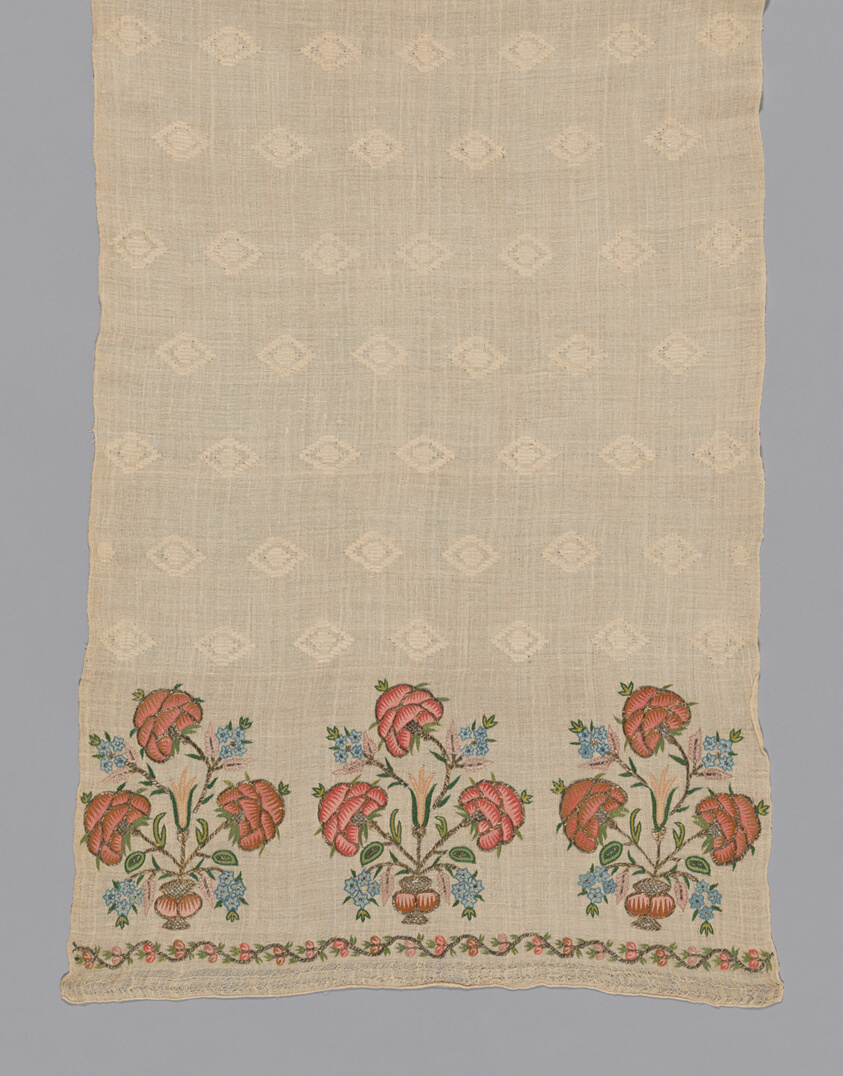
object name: Textile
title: Towel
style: ottoman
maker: Turkey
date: 1750–1850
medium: Cotton, plain weave with supplementary brocading wefts; embroidered with silk and metal-strip-wrapped silk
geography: Turkey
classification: textile; needlework (visual works); weaving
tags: floral arrangements, diamond shapes, flowers